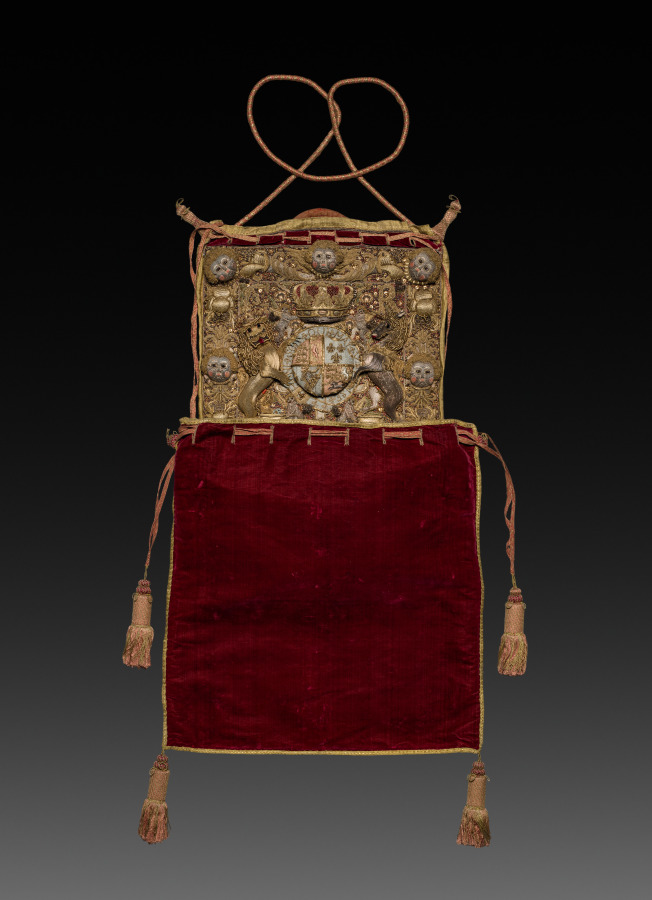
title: Lord Chancellor's Burse (Purse) with Royal Cypher and Coat of Arms of George III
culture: England, 18th century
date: 1760–1801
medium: Red silk velvet, silk embroidery, goldwork, pearls, black beads, sequins, pendant tassels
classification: Velvet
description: A richly decorated burse (purse) to hold the monarch's Great Seal of the Realm has a traditional role in the opening of parliament. The safekeeping of the seal was the responsibility of the Keeper of the Great Seal, an office later incorporated into the role of Lord Chancellor. Because the Great Seal was attached to all major documents of state, it was the ultimate symbol of royal authority. The use of a special burse to hold the seal can be traced back to the end of the 13th century. By the end of the 16th century, the burse had evolved into the highly decorated, professional work of embroidery seen in this object. It includes the lion and unicorn surrounding the royal crest and is made from crimson velvet. Burses were replaced annually; it being a "perk" of office that the Lord Chancellor and Keeper of the Great Seal was allowed to keep the fragments of the old seal and accompanying burse. Portraits of Lord Chancellors, from the Tudor period onward, depict them with their burse. Cleveland’s collection includes one such portrait by American artist Gilbert Stuart (1755–1828) of Irish Lord Chancellor John FitzGibbon, 1st Earl of Clare (1748–1802) who was Lord Chancellor from 1789 to 1802. Baron FitzGibbon’s portrait (1919.910) is on view in gallery 204.